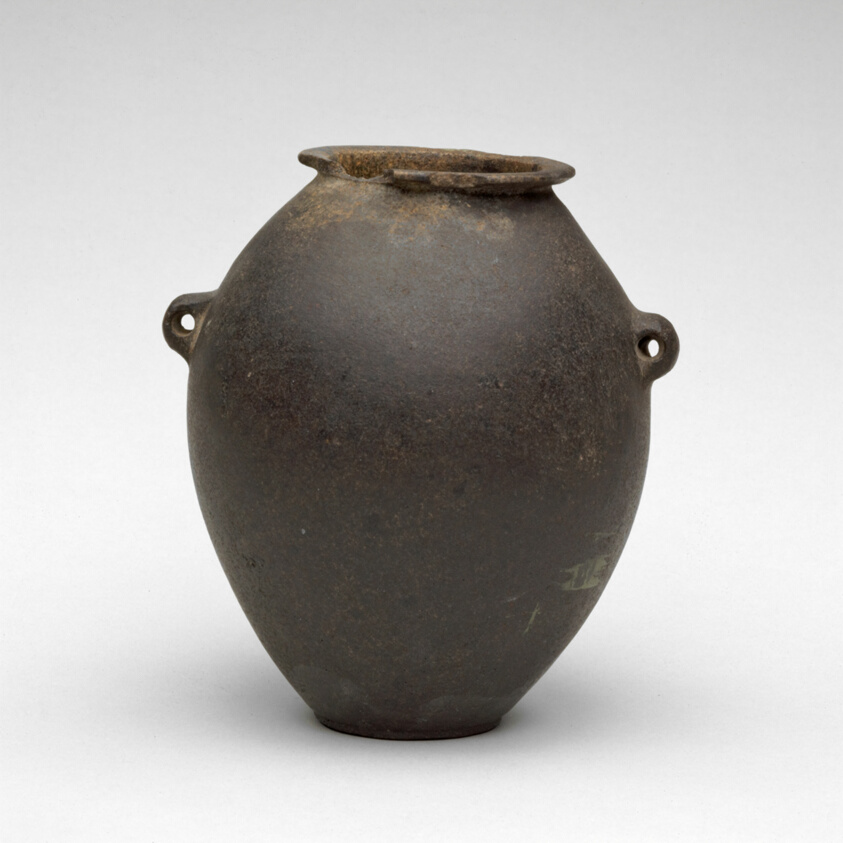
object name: Vessel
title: Vessel with Lug Handles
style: old kingdom, first intermediate period, egyptian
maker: Egyptian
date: Predynastic Period–Old Kingdom (about 4000–2250 BCE)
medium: Stone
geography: Egypt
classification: vessel; stone; ancient art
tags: vessels